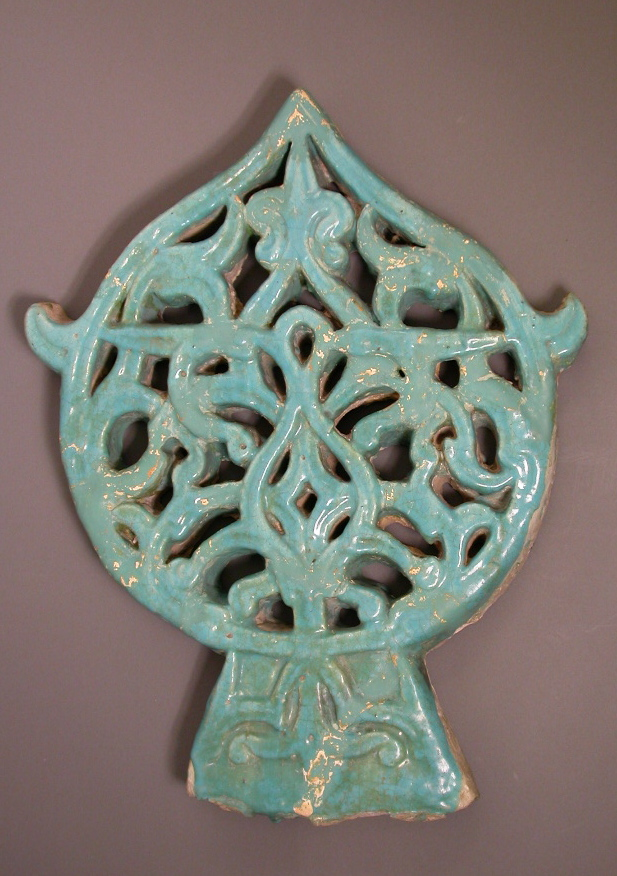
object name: Architectural fragment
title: Ceramic Architectural Decoration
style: rayy, Islamic (culture or style)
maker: Iran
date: 13th century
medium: Fritware, with carved and molded decoration under a turquoise glaze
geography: Rey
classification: ceramics; asian art; architectural fragment